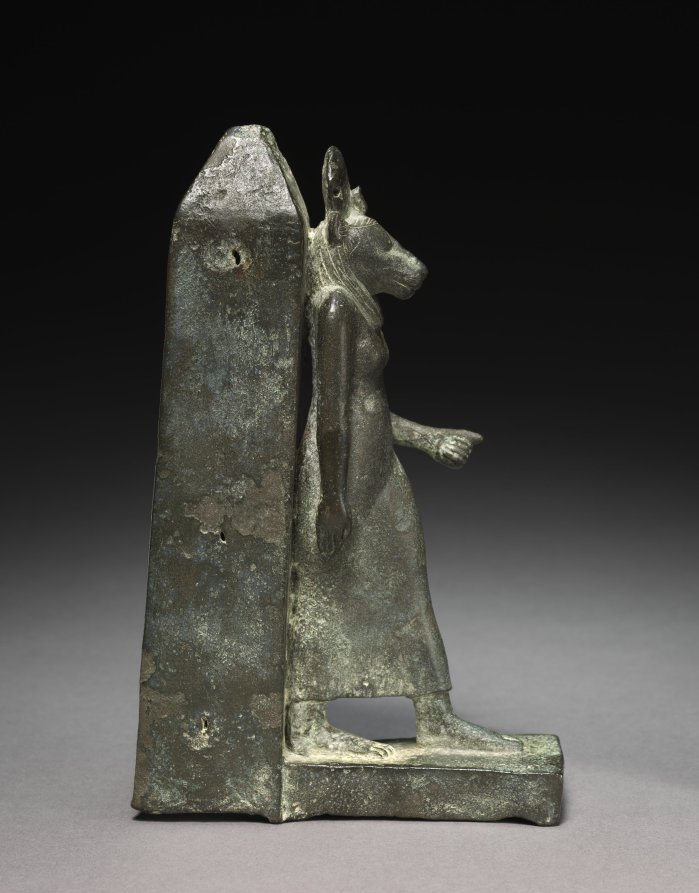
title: Statuette of Sekhmet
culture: Egypt, Late period (715–332 BCE), Dynasty 26 or later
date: 664–525 BCE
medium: bronze, figure solid cast, obelisk hollow cast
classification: Sculpture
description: The lion-headed goddess Sekhmet strides forward wearing a long, tight-fitting dress and striated wig indicating her divine nature. Behind her is an obelisk that is hollow and originally open at the bottom. Her left hand would have held an attribute such as a staff, which is now lost.